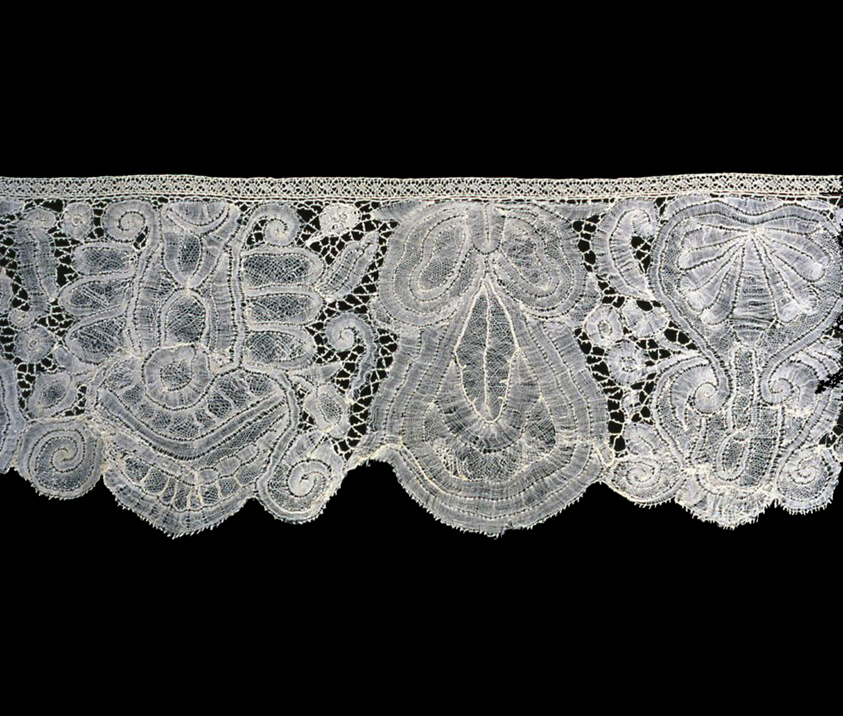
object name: Textile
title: Flounce (Furnishing)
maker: Flanders or England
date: 1725/1800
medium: Linen, bobbin part lace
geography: Flanders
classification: textile; lace - bobbin